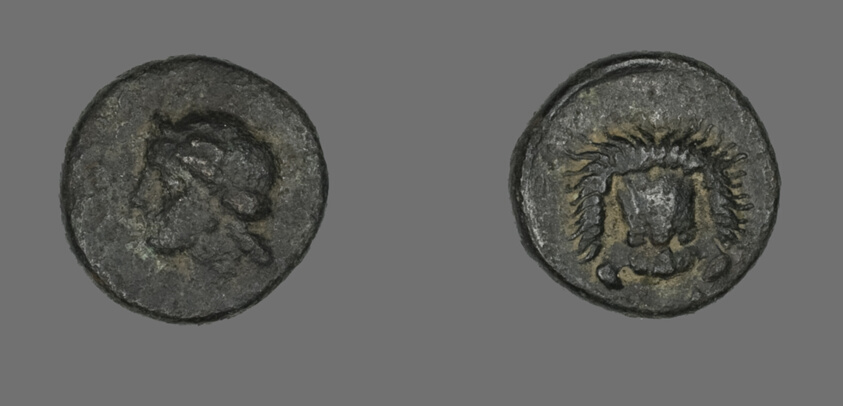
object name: Coin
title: Coin Depicting the Goddess Hera (?)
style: greek, ancient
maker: Greek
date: 5th century BCE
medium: Bronze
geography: Ancient Greece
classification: coin; ancient art